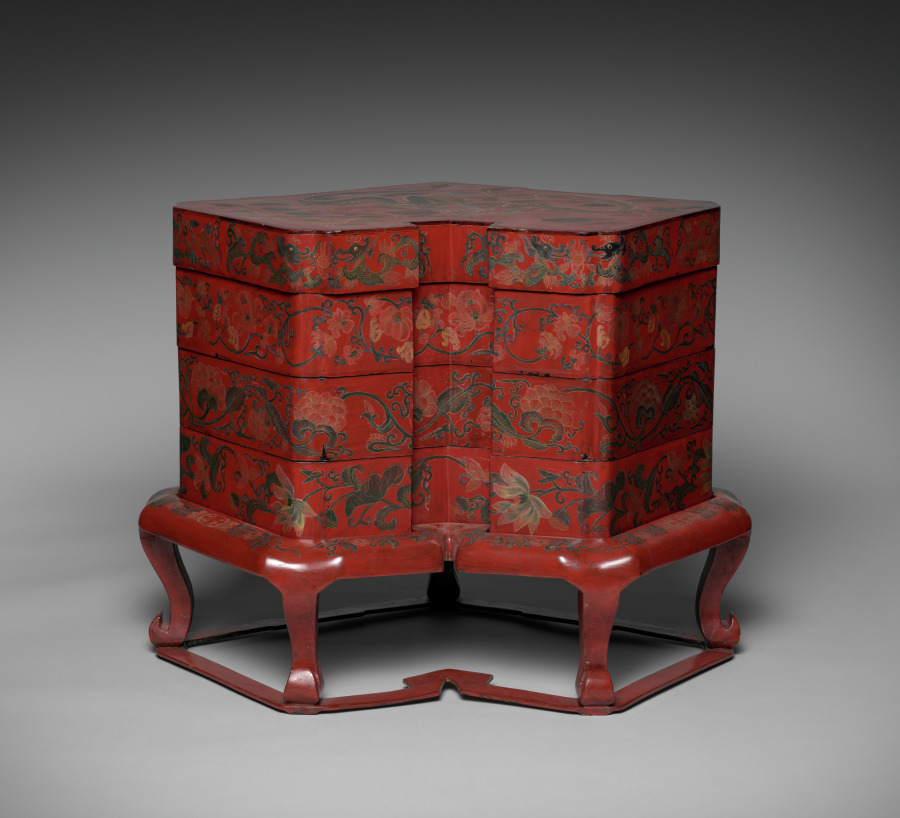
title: Tiered Food Box with Stand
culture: Japan, Edo period (1615–1868)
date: late 1700s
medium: red lacquer over a wood core, with litharge painting and engraved gold designs (Ryukyuan)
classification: Lacquer